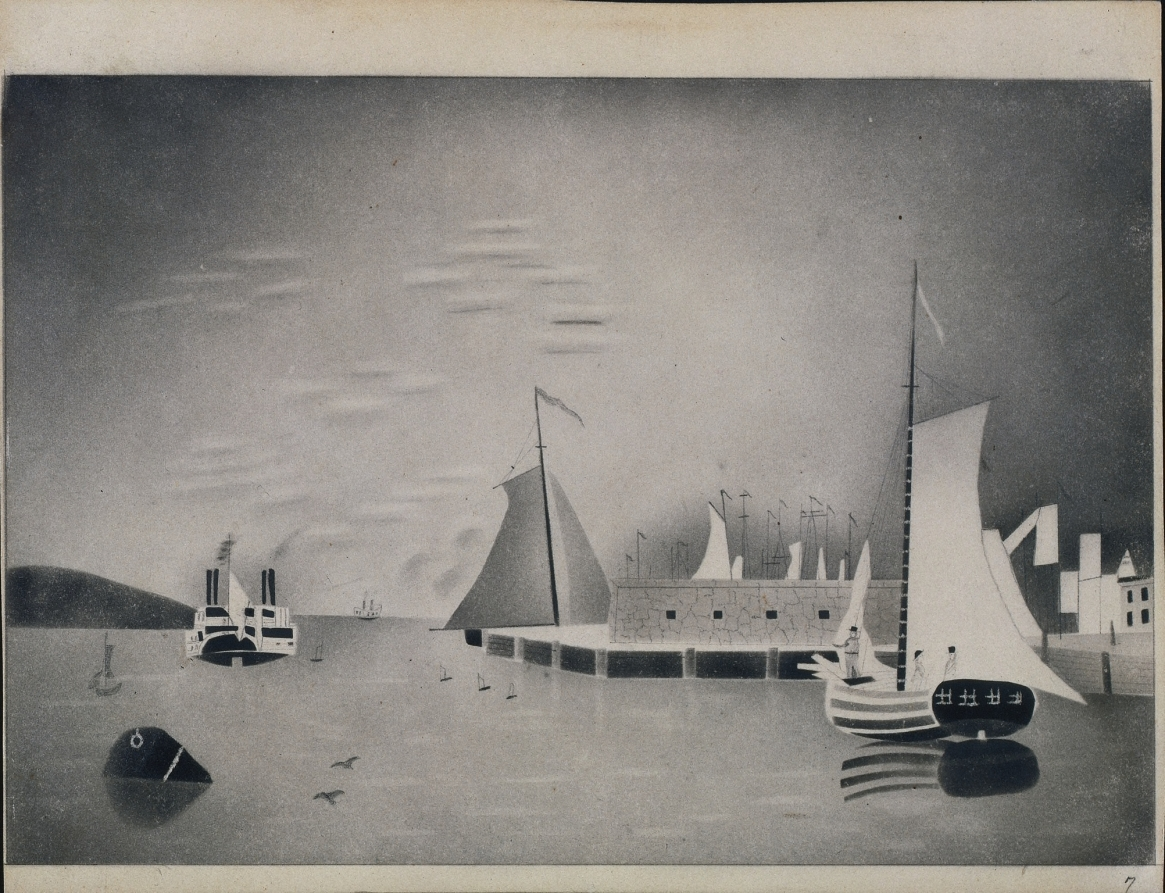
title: Harbor Scene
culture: America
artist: Mary Altha Nims (American, 1817–1907)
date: 1850s or 60s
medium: pencil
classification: Drawing